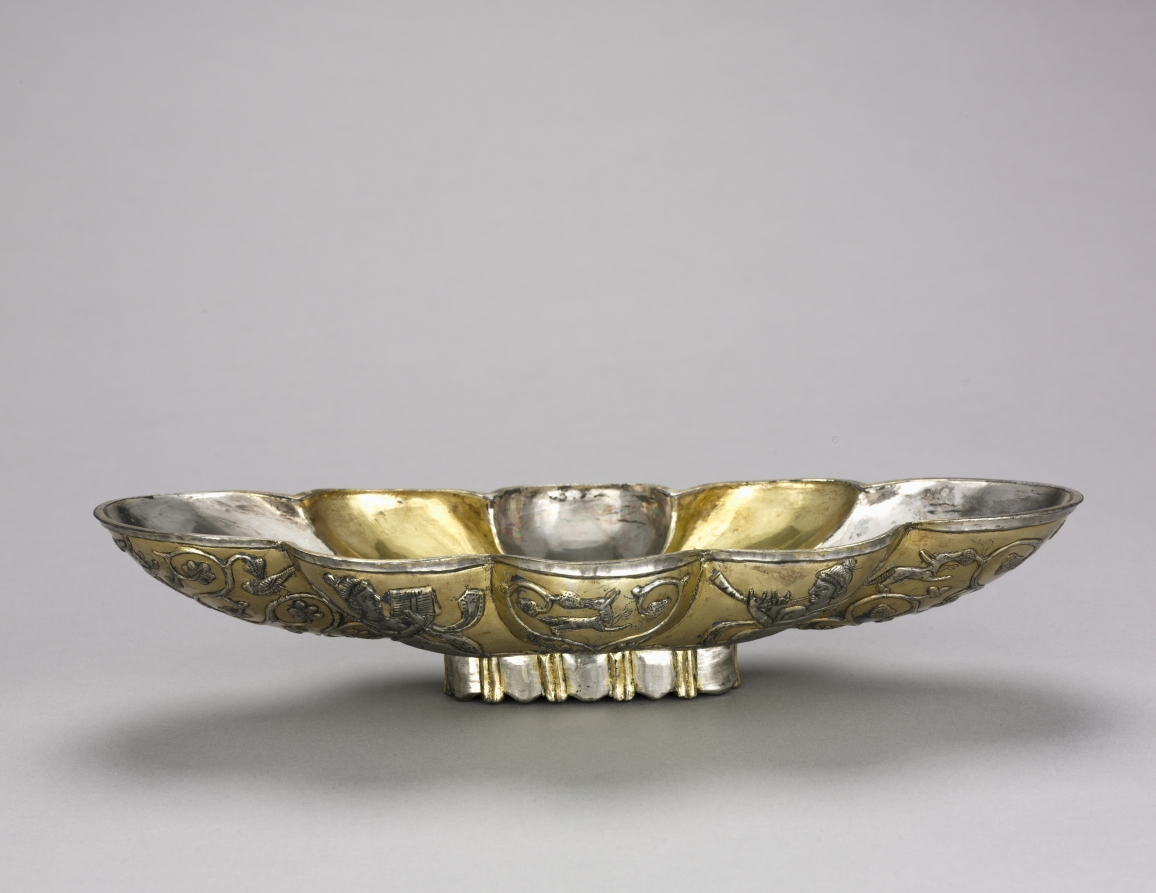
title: Bowl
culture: Iran, Sasanian Empire (224–651 CE)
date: 300–500 CE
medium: silver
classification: Metalwork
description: The decoration on this bowl—a vine with a little nude, accompanied by musicians drinking wine from a rhyton—is related to the Hellenistic cult of Dionysos, or Bacchus, which was brought to Iran by the Greeks and became absorbed into the cult of Anahita.